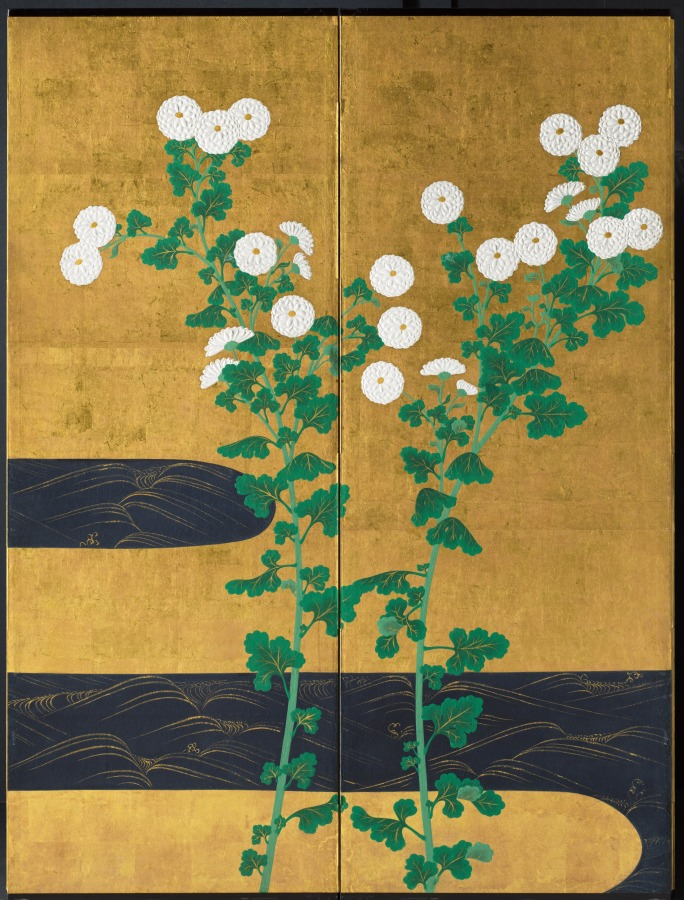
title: Chrysanthemums by a Stream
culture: Japan, Edo period (1615–1868)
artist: possibly by Ogata Kōrin (Japanese, 1658–1716)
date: c. 1715–30 or after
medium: One of a pair of six-panel folding screens; ink and color on gilded paper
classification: Painting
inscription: the signature and seal of Korin, "sensen mappa (makko) inshi hokyo Korin" (late generation hermit of the Kamo stream tradition) is written in two lines. A circular seal which reads "Hoshuku" is at the end of the second line on the edge of the first panel from the right.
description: These screens recall a painting style so closely identified with Ogata Kōrin (1658–1716) that it is called Rinpa, or “Rin School,” after the ideograph “rin” in his name. The highly stylized background accentuates floral groupings that have been groomed so as to appear utterly artificial, like the synthetic arrangements available today. Kōrin's genius derived in large measure from natural phenomena painstakingly observed and then manipulated to create compositions of startling refinement and sparkling isolation. This process may have grown out of Kōrin's early immersion in the family textile business, a medium that encourages such dramatic distillations of form: the stream's gold-crested waves bring to mind traditional kimono robe designs of Kōrin's era. Works with the signature seen on this painting, including a style name, or persona suggested to Kōrin by his brother Kenzan (1663–1743), are sometimes considered to have been produced either in the last year of his life, when he was very ill, or after his death. In both scenarios, the lion’s share of the work would have been done by studio assistants, but little is truly known of his studio practice. Given the regularity of the gold waves on the stream, and the tension in the arrangement of the chrysanthemums, it is also possible that the screens were made in emulation of Kōrin's designs by a later artist.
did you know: The signature used on these screens may indicate paintings made in the last year of the artist's life, or works completed by his studio after his death.